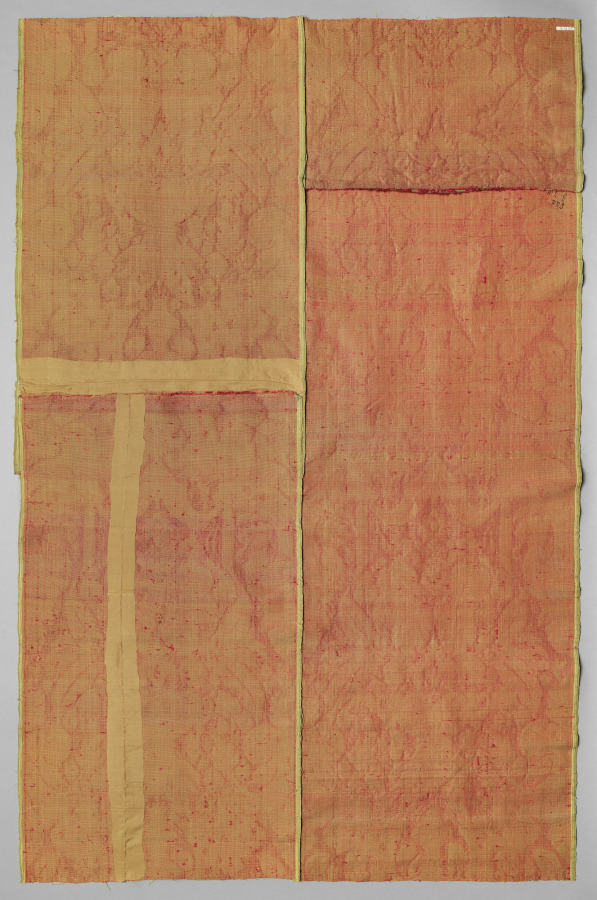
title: Velvet Fragment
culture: Italy, Genoa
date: 1600s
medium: velvet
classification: Velvet